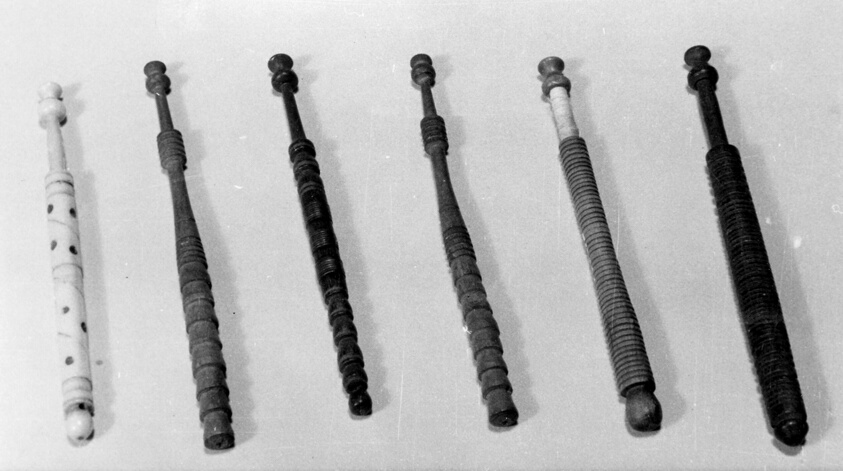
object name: Textile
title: Twenty-five Bobbins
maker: England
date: 1801/25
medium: 1957.186a: Turned wood 1957.186b: Turned wood 1957.186c: Turned wood 1957.186d: Turned wood 1957.186e: Turned wood 1957.186f: Turned wood with brass wire coiling 1957.186g: Turned wood 1957.186h: Turned wood 1957.186i: Turned wood 1957.186j: Plain wood wound with linen 1957.186k: Plain wood wound with linen 1957.186l: Plain wood wound with linen 1957.186m: Plain wood wound with linen 1957.186n: Plain wood wound with linen 1957.186o: Plain wood wound with linen 1957.186p: Plain wood wound with linen 1957.186q: Plain wood wound with linen 1957.186r: Plain wood wound with linen 1957.186s: Plain wood wound with linen 1957.186t: Turned wood wound with linen 1957.186u: Turned wood wound with linen 1957.186v: Turned wood wound with linen 1957.186w: Turned wood with lead color stripes wound witth linen 1957.186x: Turned wood with lead color dots wound with linen 1957.186y: Ivory with black and red carved dots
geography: England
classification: bobbins; textile